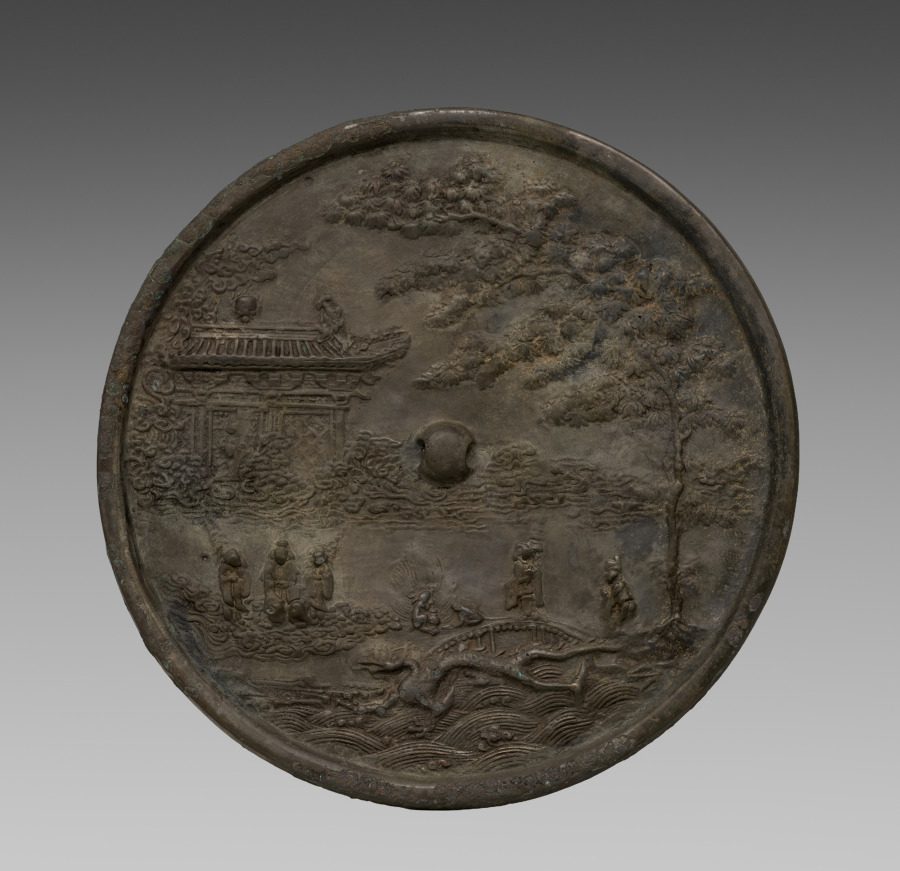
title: Octafoil Mirror with Lunar Palace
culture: China, Jin dynasty (1115–1234)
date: early 1100s–mid-1200s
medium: bronze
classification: Metalwork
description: Bronze mirrors typically have one polished and one decorated side and were used in tombs for ritual purpose or served as disks for reflection. This mirror depicts the imagined scene of the moon in Chinese mythology. Legend says that the goddess Chang E consumed the elixir of immortality that she stole from her husband, the archer Yi, and flew to the moon. Chang E’s palace, the Broad Cold Palace (Guanghan gong) on the left side of the composition, is juxtaposed with a tall pine tree symbolizing longevity.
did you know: A rabbit and a toad, both creatures believed to live on the moon, can be seen in the center.